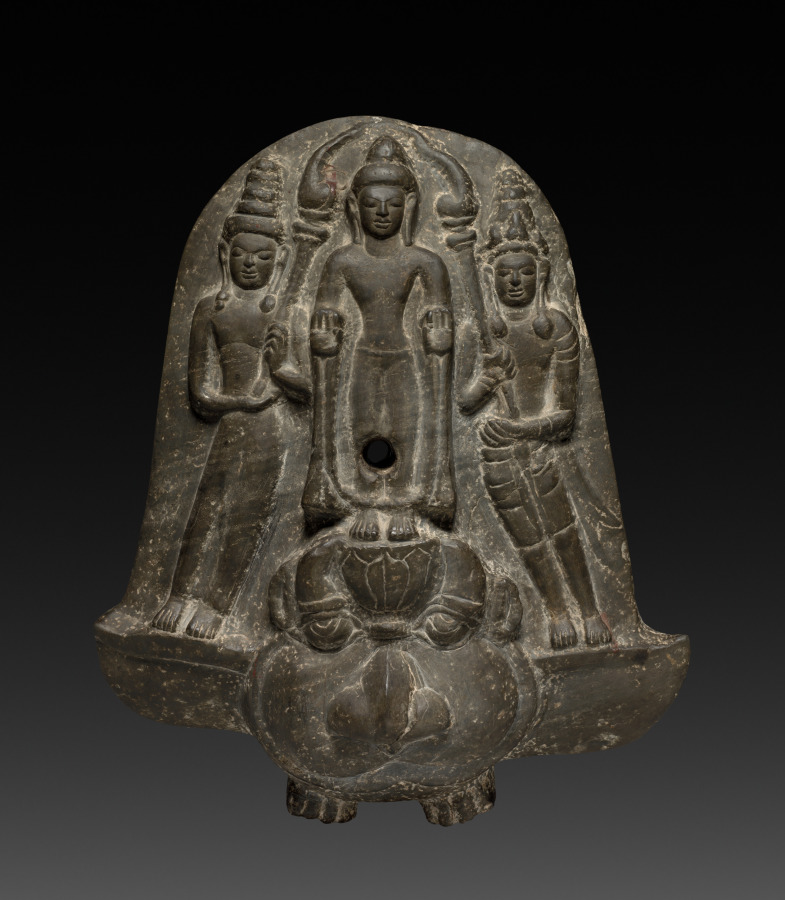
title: Bracket with Buddha and a Pair of Acolytes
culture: Thailand, Mon-Dvaravati style, probably from Nagara Pathama, 8th-9th Century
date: 700s–800s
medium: gray schist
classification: Sculpture